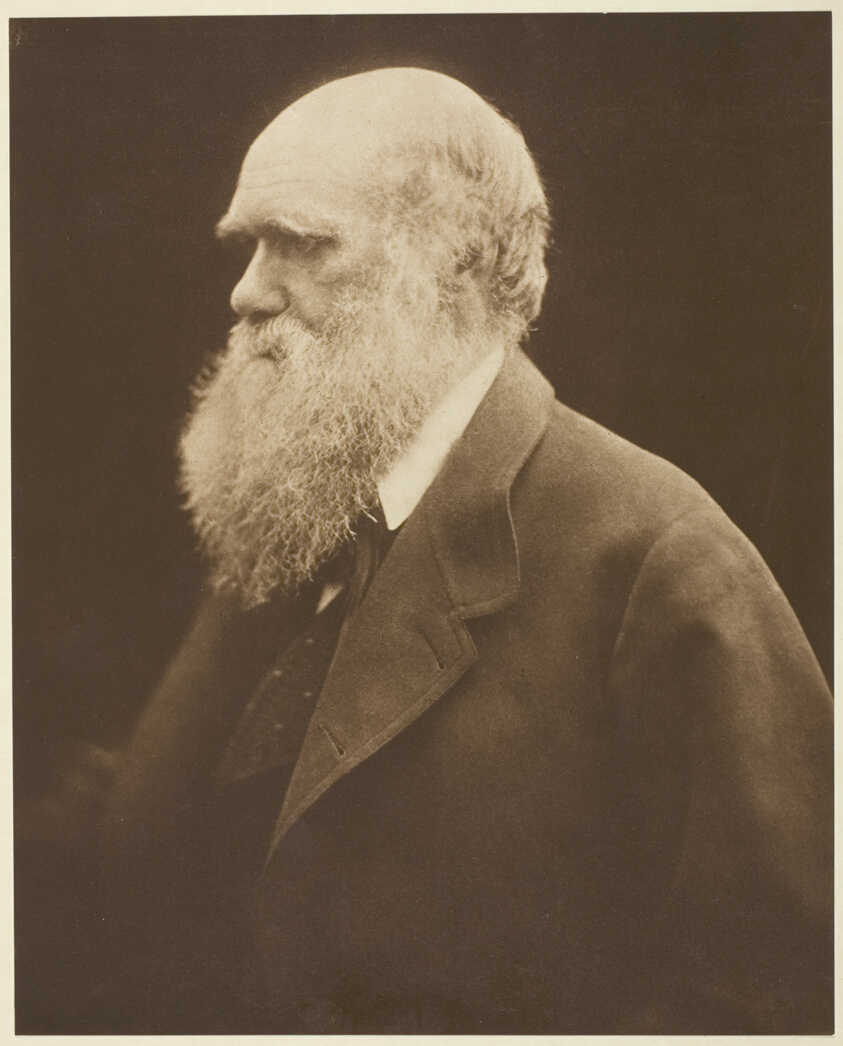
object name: Photograph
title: Charles Darwin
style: 19th century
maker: Julia Margaret Cameron (English, 1815–1879)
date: c. 1868, printed 1875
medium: Carbon print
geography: England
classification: carbon print; pigment process; photographic process; photography; photograph